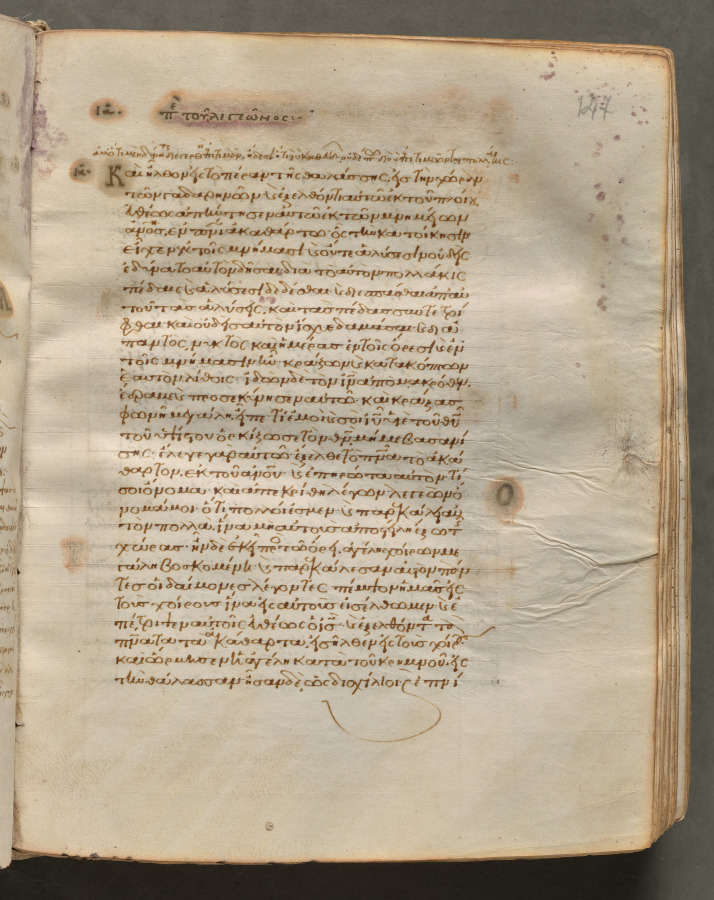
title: Text, folio 147 (recto), from a Gospel Book with Commentaries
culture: Byzantium, Constantinople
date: c. 1000–1100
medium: ink, tempera, and gold on vellum; leather binding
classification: Bound Volume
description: Each of the four gospels in this book opens on a page with brilliantly illuminated borders depicting the author of the text as well as birds-principally peacocks, symbols of the immortality of the soul-and fountains, representing the fountain of life and the salvation of the soul. This volume consists of 428 leaves with texts in Greek. Its level of sophistication suggests that it was probably written and decorated in a monastery in Constantinople.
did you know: Gospel Books were carried in procession through Byzantine churches.